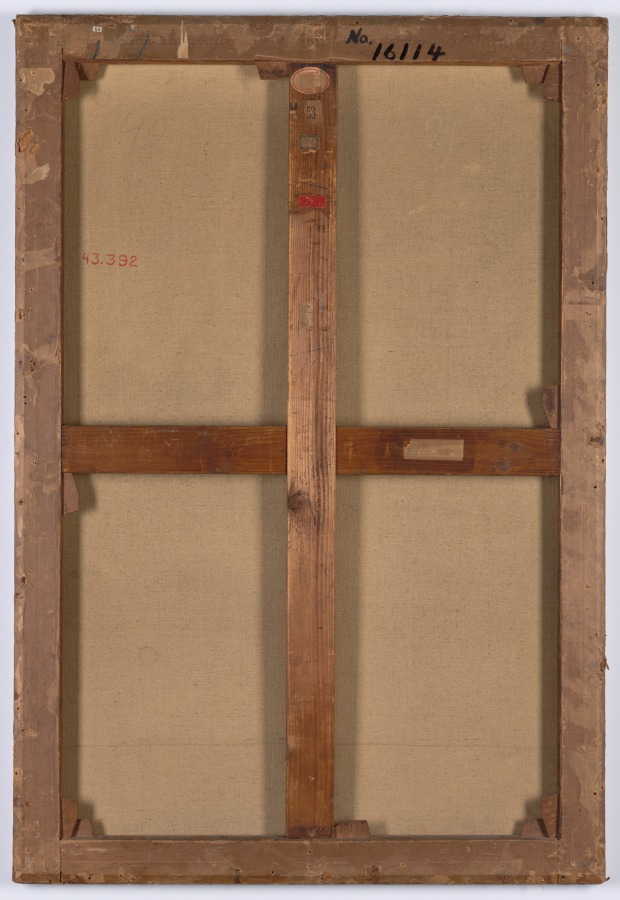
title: The Call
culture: France, late 19th-early 20th Century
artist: Paul Gauguin (French, 1848–1903)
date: 1902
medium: oil on fabric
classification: Painting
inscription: Signed lower right: P. Gauguin / 1902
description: Painted on a remote island in Polynesia a year before the artist's death, The Call belongs to a series of late works that explore the mysteries of life and death. Two women stand with bare feet, as if on sacred ground. One woman gestures to someone outside the picture, perhaps responding to a "call" from fate or destiny. Gauguin realized his ambition of painting from memory and the imagination through such mysterious, dreamlike images.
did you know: Although known as one of the founders of modern art, Gauguin found inspiration in ancient Greek, Roman, and Egyptian art. The woman with the pointing finger on the right side of this painting was taken from a figure on the Parthenon frieze.